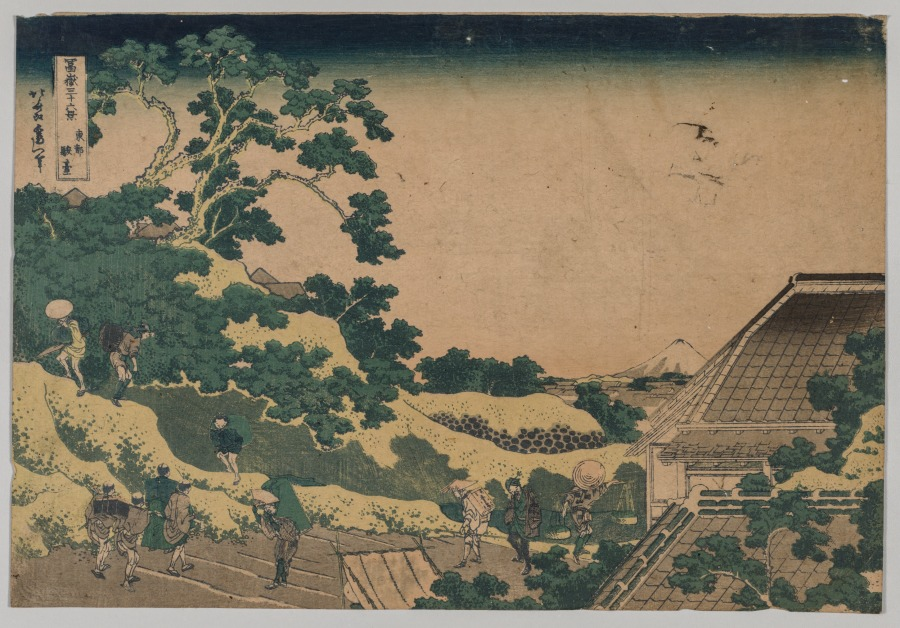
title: Fuji from Surugadai, in Yedo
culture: Japan, Edo period (1615–1868)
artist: after Katsushika Hokusai (Japanese, 1760–1849)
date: 1760–1849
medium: color woodblock print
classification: Print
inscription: Signature: Hokusai aratame I-itsu fude